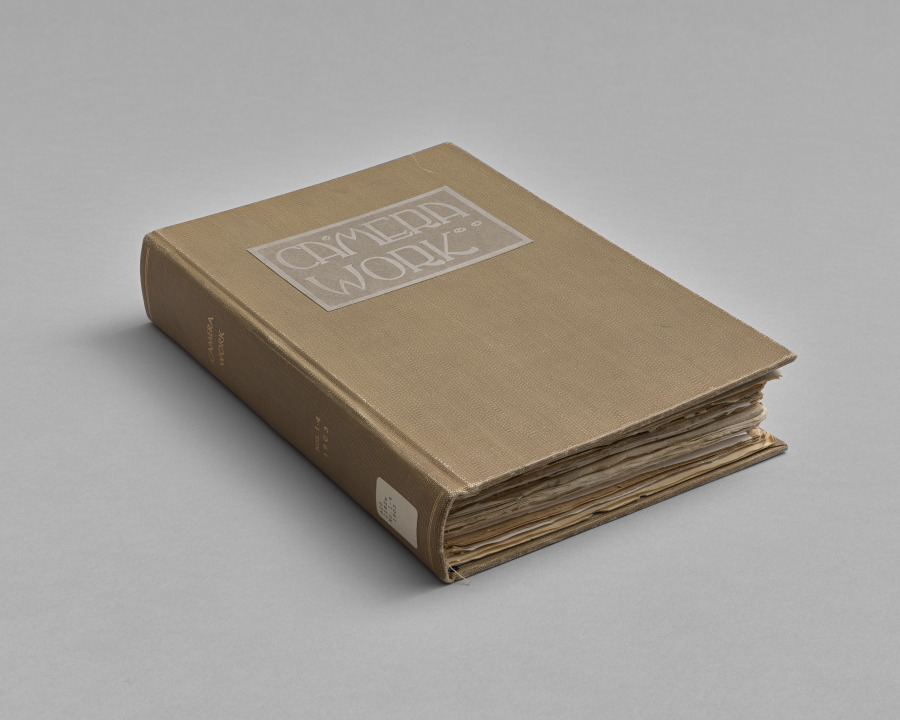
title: Camera Work: Number 3, July 1903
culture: America and England, 20th century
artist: Alfred Stieglitz (American, 1864–1946)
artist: Alvin Langdon Coburn (British, 1882–1966)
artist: Clarence H. White (American, 1871–1925)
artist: John Francis Strauss (American)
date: 1903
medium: Halftone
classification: Bound Volume